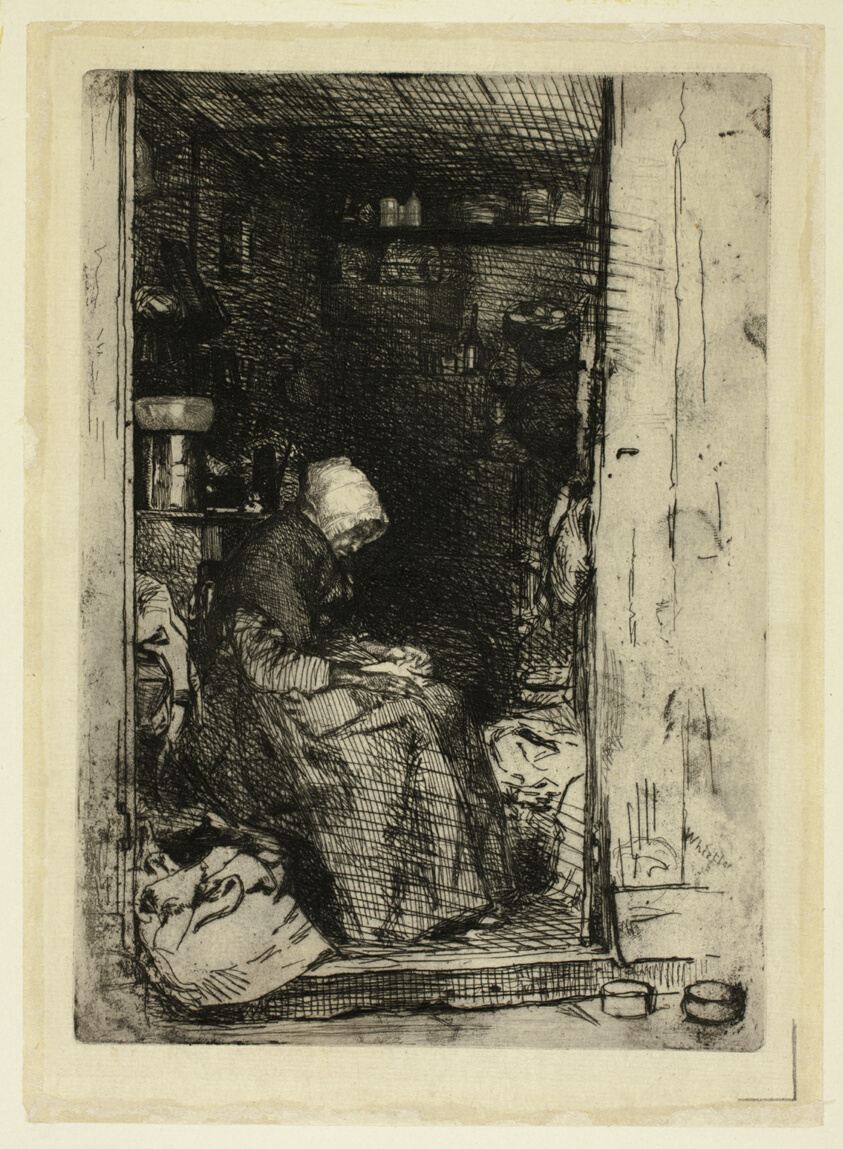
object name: Print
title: La Vieille aux Loques (The Old Woman with Rags)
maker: James McNeill Whistler (American, 1834-1903)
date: 1858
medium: Etching and drypoint with foul biting in black ink on cream Japanese paper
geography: United States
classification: etching; foul biting; print; prints and drawing; paper; drypoint